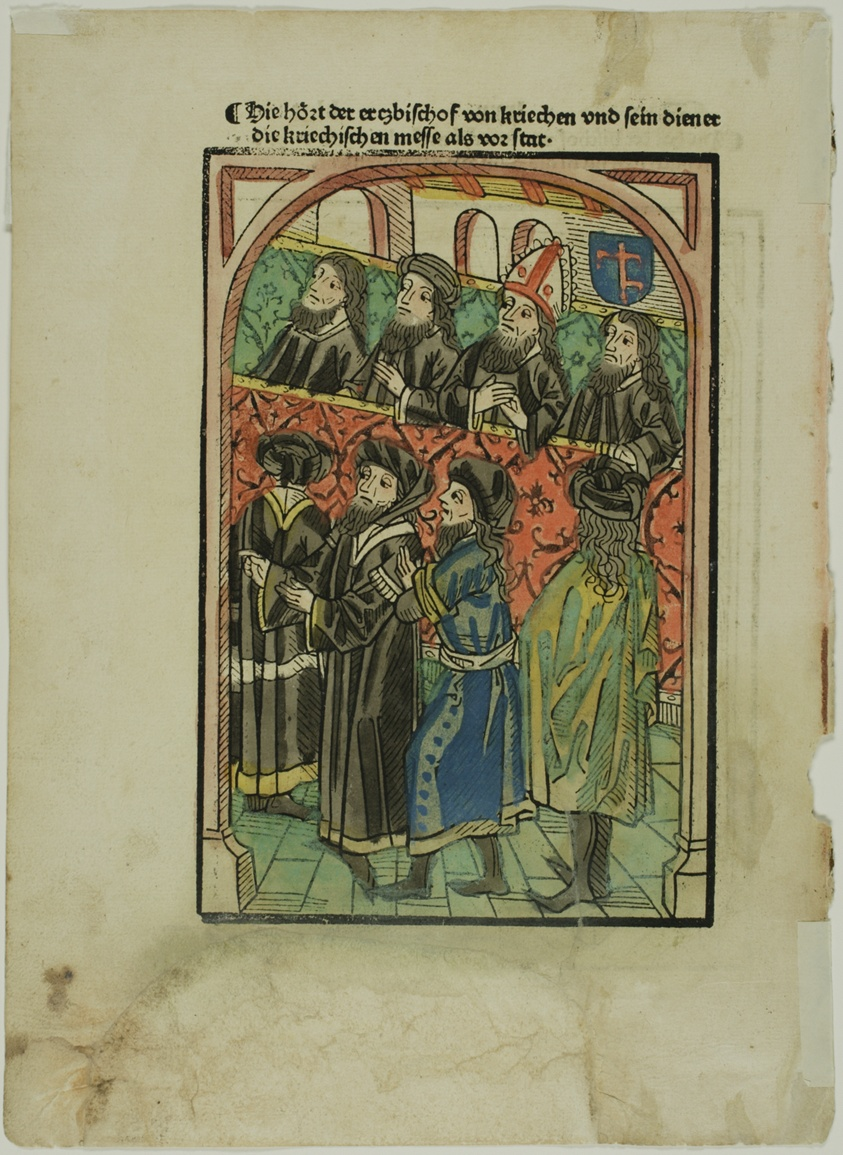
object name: Print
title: Pope Martin Conducting Mass from Conciliumbuch (recto); Greek Bishop and His Servant Hearing Mass (verso)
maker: Ulrich von Reichenthal (German, c. 1365-1437); or an unknown Artist (Augsburg, 15th century); printed by Anton Sorg, Augsburg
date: 1483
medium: Handcolored woodcut (recto and verso) on white laid paper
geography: Germany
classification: woodcut; print; prints and drawing; paper